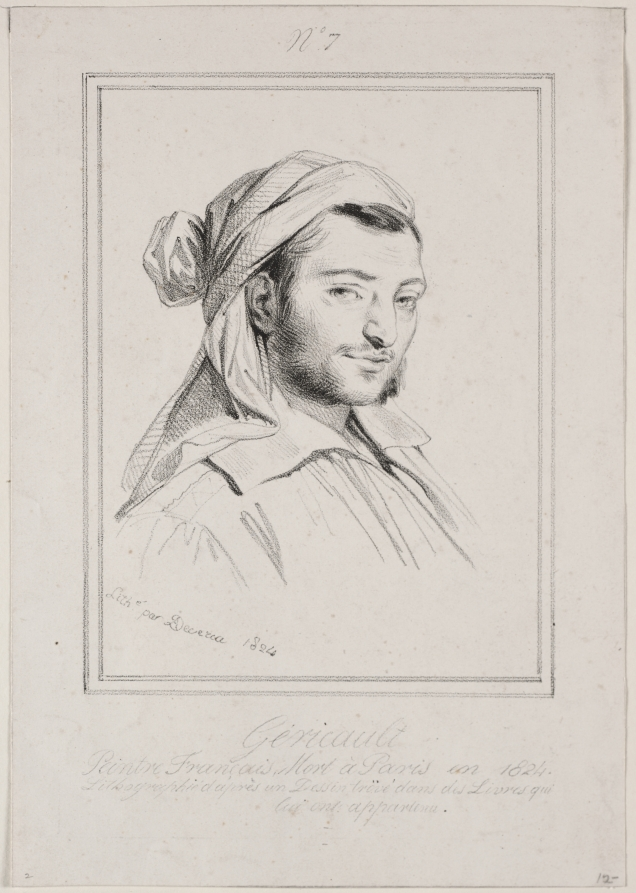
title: Théodore Géricault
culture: France, 19th century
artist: Achille Devéria (French, 1800–1857)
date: 1824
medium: lithograph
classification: Print